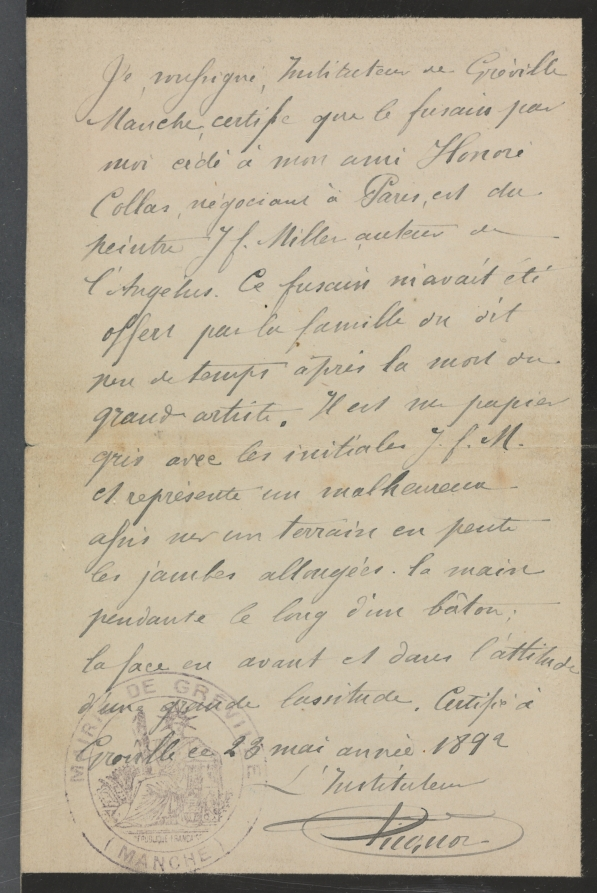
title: Seated Peasant Resting on a Hoe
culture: France, 19th century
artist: Jean-François Millet (French, 1814–1875)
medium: fabricated black chalk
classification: Drawing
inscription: inscribed in graphite, lower left: "J. F. M."